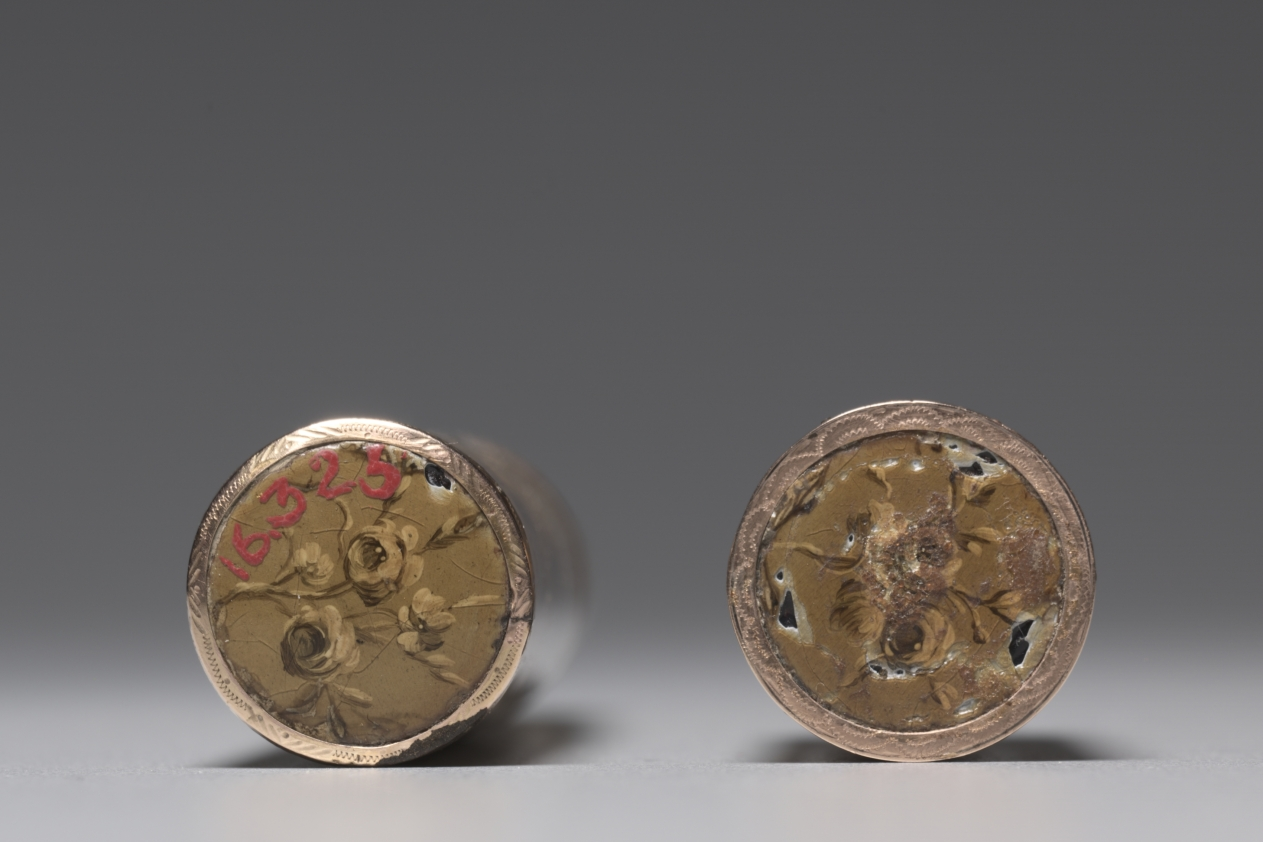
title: Needle Case (Etui à Aiguilles)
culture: France, Paris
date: 1768–69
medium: painted wood, gold mounts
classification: Miscellaneous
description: The material of cases like these delineated the status of the holder. More expensive materials such as ivory, tortoiseshell, or silver were reserved for wealthier users while more common cases were made of lacquered papier-mâché or wood. This wooden case is decorated with vernis martin, a domestic varnish imitating East Asian true lacquer. The sinuous lines, floral garlands, and putti, personifications of love in the form of winged infants, exemplify typical rococo imagery.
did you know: In the 1500s these cases were commonly fabricated to hold pins and needles for master tailors, but became more widely produced for women during the 1700s.